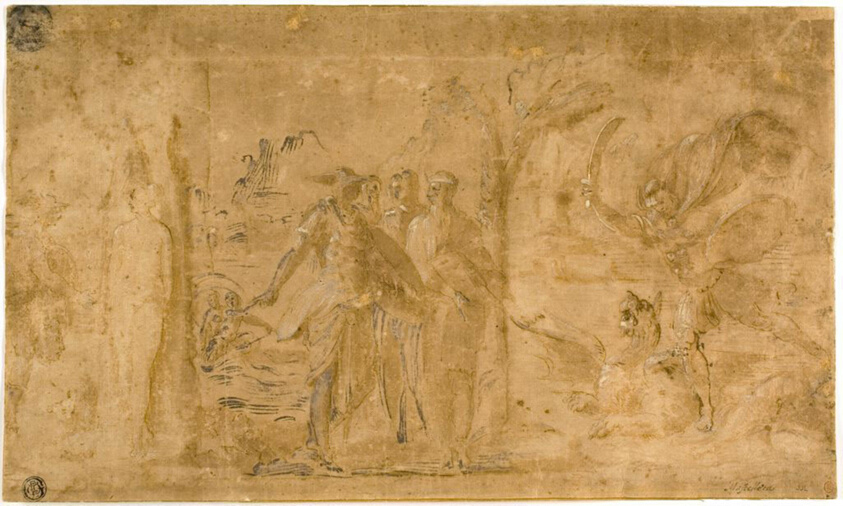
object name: Drawing and Watercolor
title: Study for Perseus Liberating Andromeda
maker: Pietro Buonaccorsi, called Perino del Vaga, after; Italian, 1501-1547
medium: Pen and brown ink, with brush and brown wash, heightened with lead white (oxidized), on tan laid paper, laid down on ivory laid paper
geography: Italy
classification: ink with wash; drawings (visual works); prints and drawing